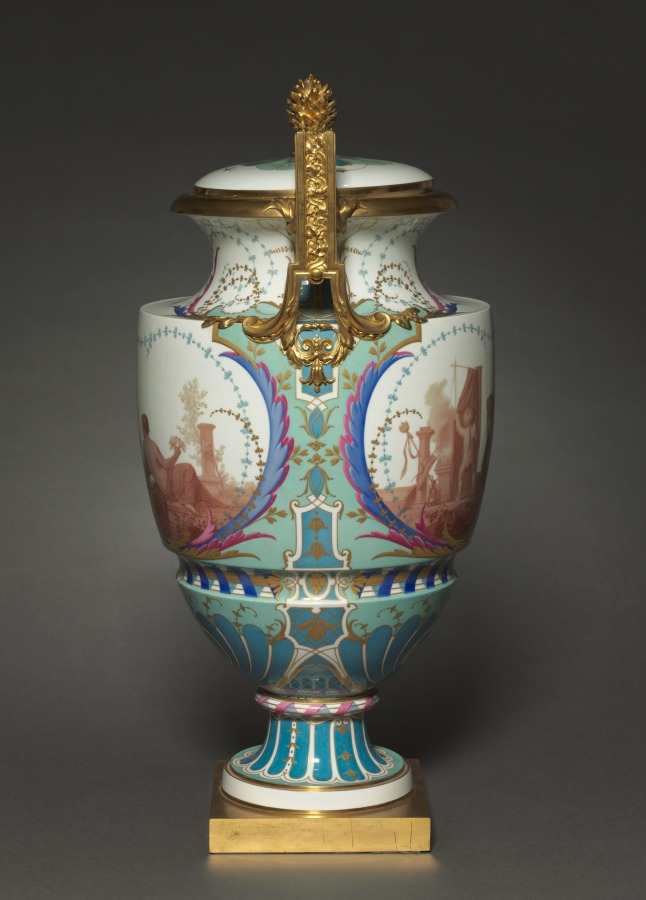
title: Vase Feuille d'Eau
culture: France, Sèvres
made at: Sèvres Porcelain Factory (French, est. 1756)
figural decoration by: Paul Marie Roussel (French, 1804–1877)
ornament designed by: Emile Renard (French)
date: 1858–62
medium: porcelain with gilt bronze mounts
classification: Ceramic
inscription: figural paintings signed obverse and reverse: "PMROUSSEL INV & PIN"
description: Feuille d'Eau means "waterleaf" and refers to the name given to the shape of this vase at the Sèvres factory. In English, waterleaf is the common name for a plant with bell-shaped flowers. The term is also applied to a stylized plant motif used in Graeco-Roman ornament. This vase was exhibited by the Sèvres firm at the International Exhibition held in London in 1862.